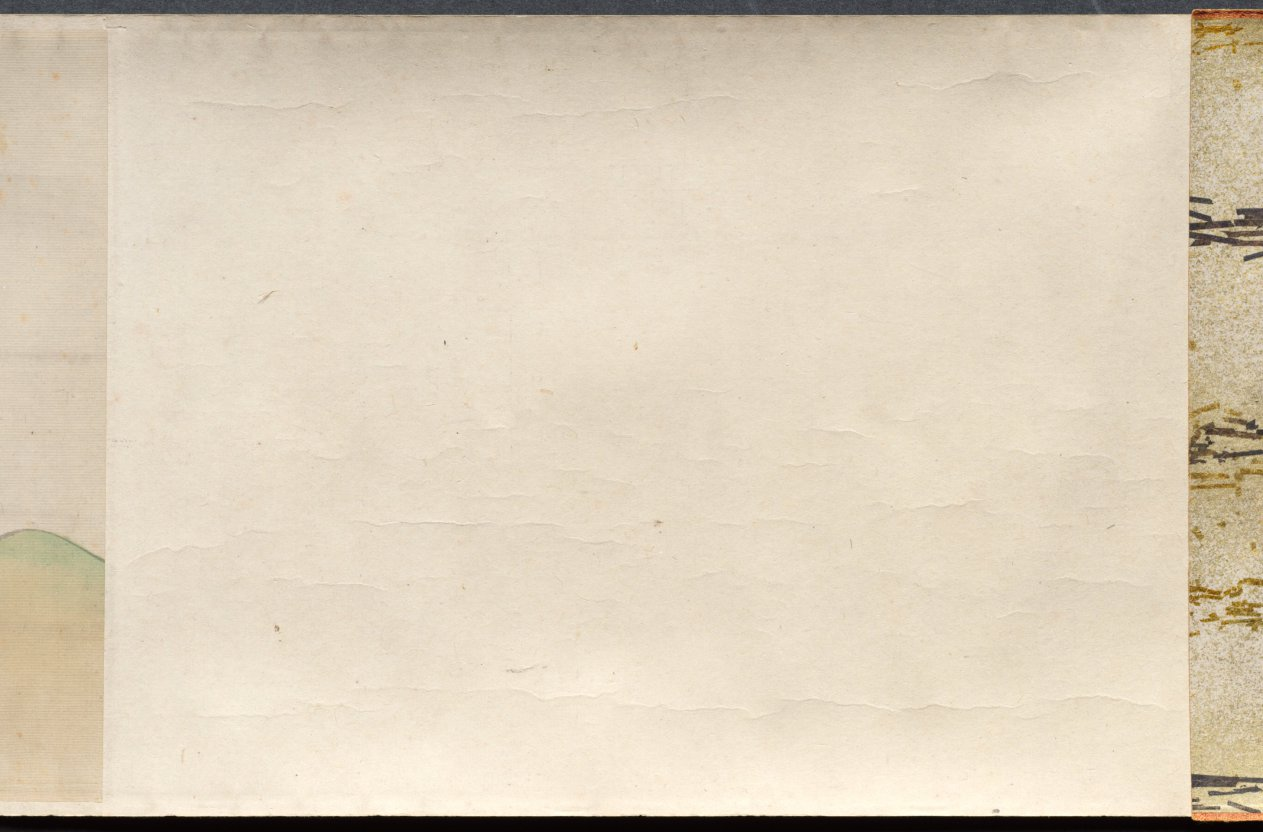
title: The Shadow Dancers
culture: Japan, Edo period (1615–1868)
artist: Yamamoto Baiitsu (Japanese, 1783–1856)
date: 1800s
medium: handscroll, ink and color on silk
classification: Painting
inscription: artist's signature and two seals at end of painting.